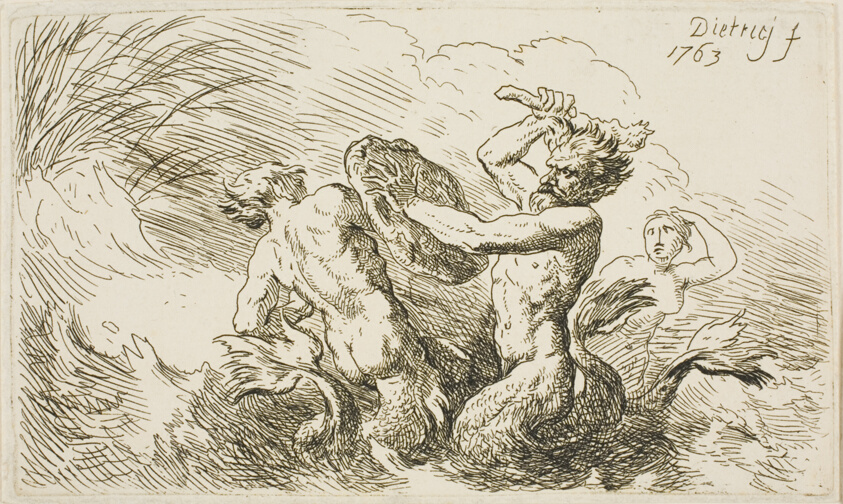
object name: Print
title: Battle of the Tritons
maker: Christian Wilhelm Ernst Dietrich (German, 1712-1774)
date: 1763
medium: Etching on paper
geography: Germany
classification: etching; print; prints and drawing